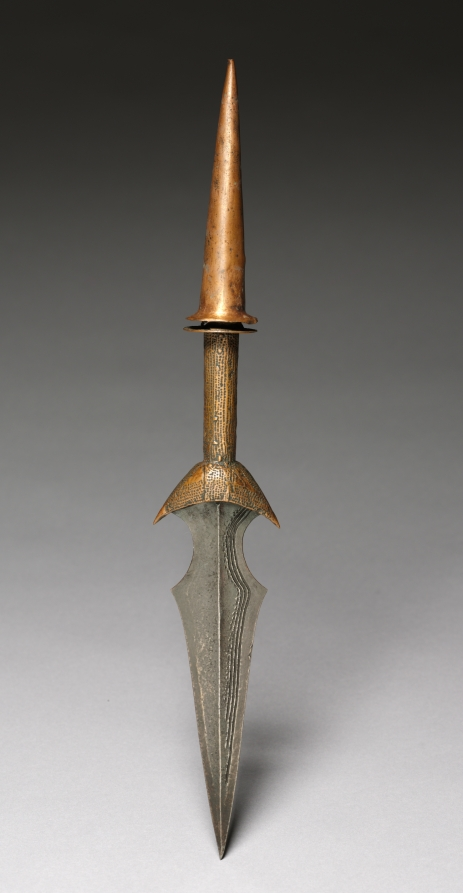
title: Knife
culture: Africa, Central Africa, Democratic Republic of Congo, unknown maker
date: 1800s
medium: Iron, wood, copper alloy, cloth, and resin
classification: Arms and Armor